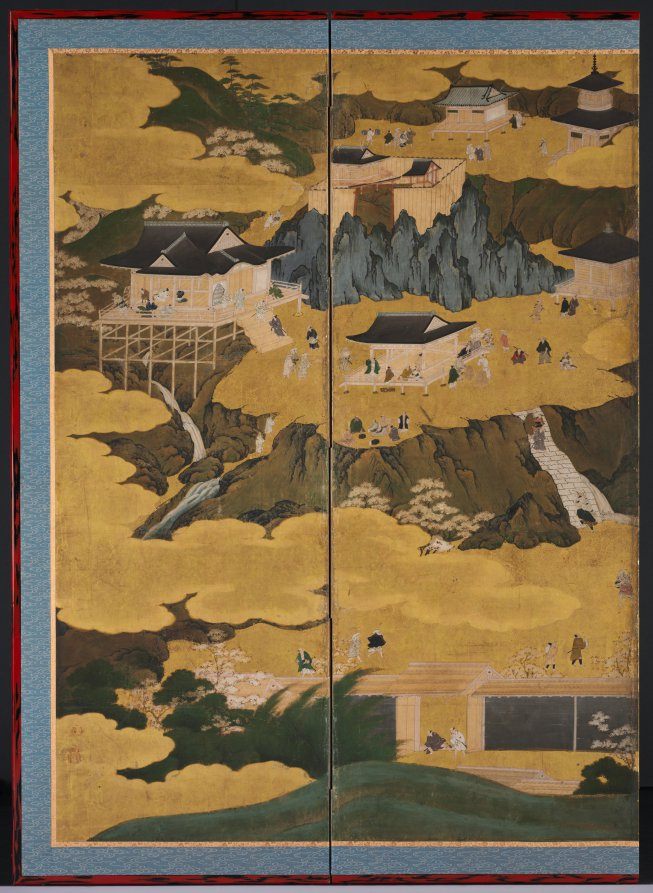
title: Famous Views of Ōmi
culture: Japan, Edo period (1615–1868)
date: 1660s–90s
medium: One of a pair of six-panel folding screens; ink, color, and gold on gilded paper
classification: Painting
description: Ōmi is an area around Lake Biwa near Kyoto. The Shinto shrine Hiyoshi Taisha and the Buddhist temple Ishiyamadera are in the upper right and upper left of the composition, respectively. At center is the pilgrimage route and people in the town before the temple gates. Harvested rice fields to the right and flowering cherry blossom trees at left show seasonal change from winter to spring.